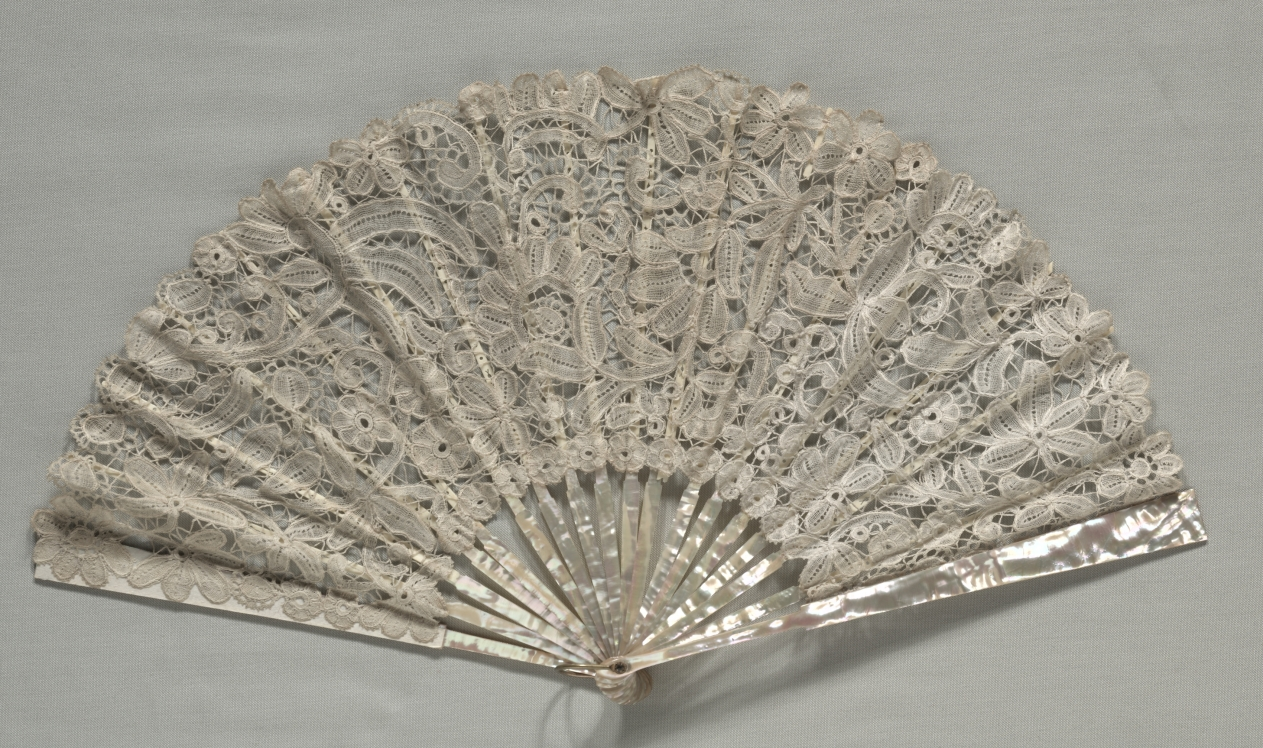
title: Lace Fan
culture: Belgium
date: c. 1860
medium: Linen: bobbin lace (Brussels); frame: mother-of-pearl and ivory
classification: Lace